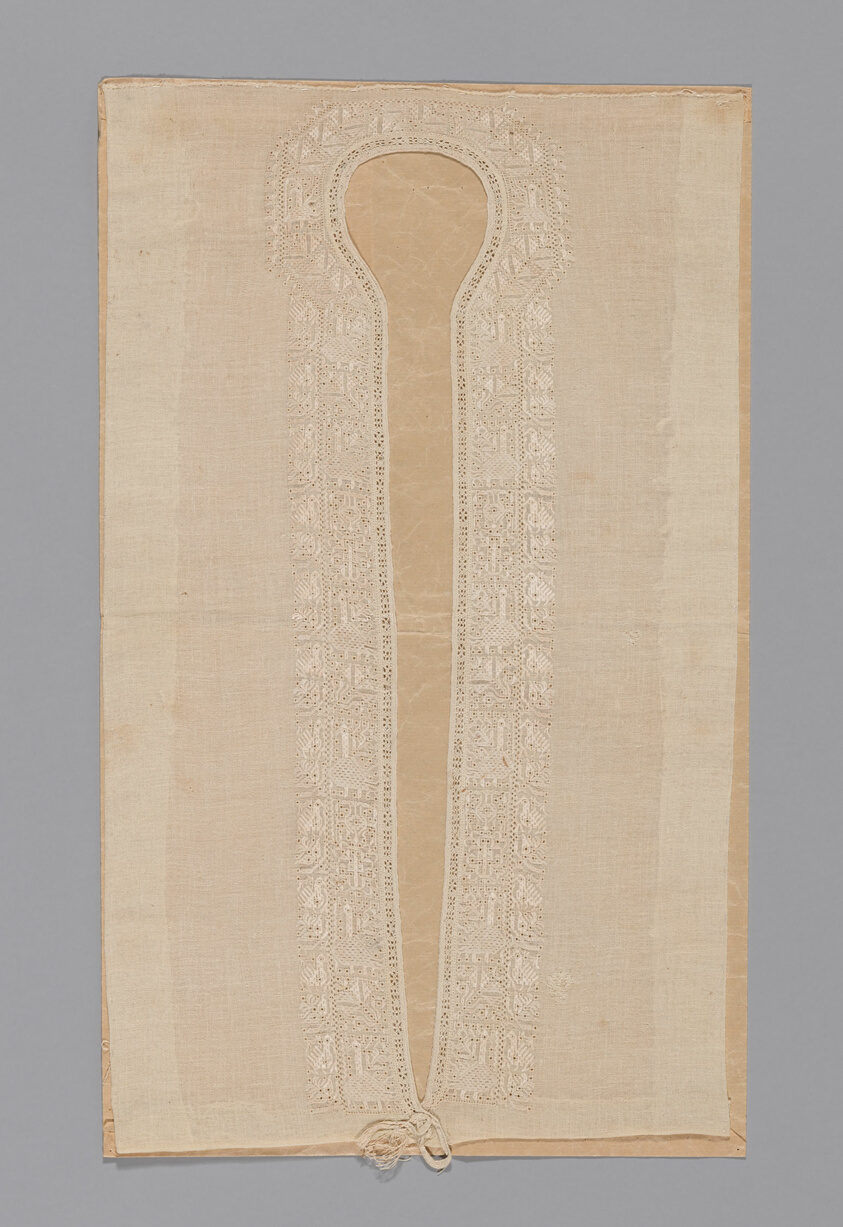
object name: Textile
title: Neck Insert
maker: Greece, Ionian Islands, Leukas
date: 18th century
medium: Linen, plain weave; embroidered in eyelet hole, hem, and satin stitches; inserts of linen, needle lace; edged with linen, twill oblique interlacing tape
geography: Levkás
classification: textile; needlework (visual works)